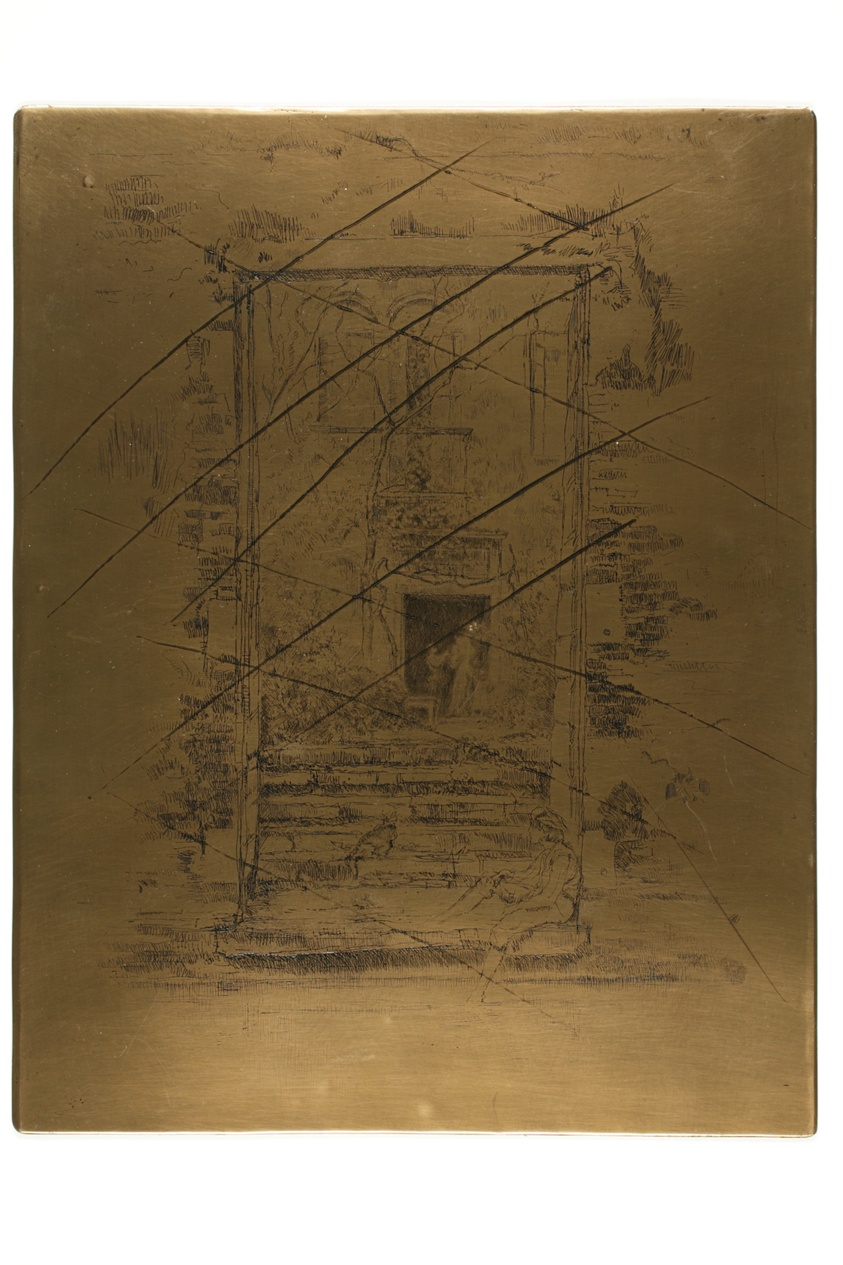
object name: Print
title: The Garden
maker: James McNeill Whistler (American, 1834-1903)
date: 1879/80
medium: Cancelled copper plate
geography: United States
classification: copper plate; prints and drawing; matrix; etched plate; print